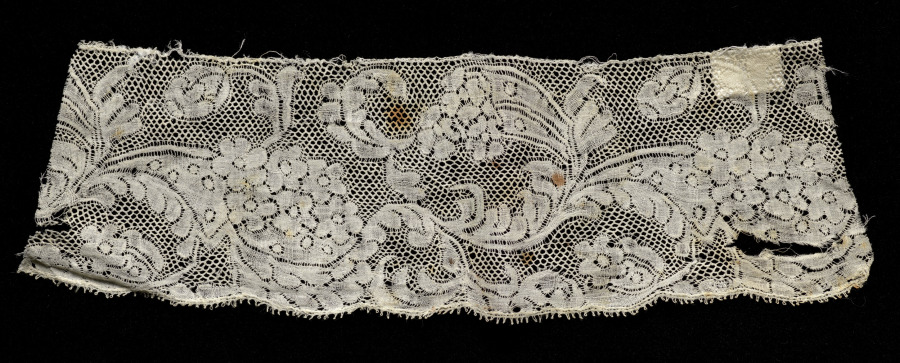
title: Lace Edging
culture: France, Valenciennes or Flanders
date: 1700s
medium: Linen: bobbin lace (Valenciennes)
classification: Lace